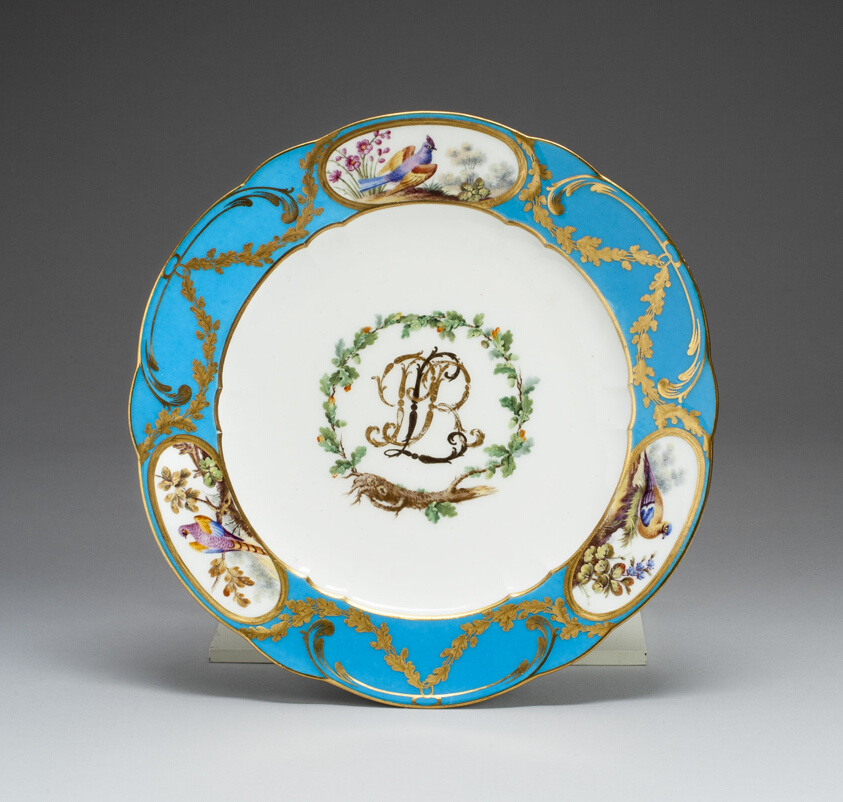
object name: Ceramics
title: Plate from the Rohan Service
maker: Sèvres Porcelain Manufactory; French, founded 1740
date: 1771–72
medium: Soft-paste porcelain, turquoise blue ground, polychrome enamels, and gilding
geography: Sèvres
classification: plate (general, dish); tableware; dish (vessel); ceramics; porcelain; european decorative arts